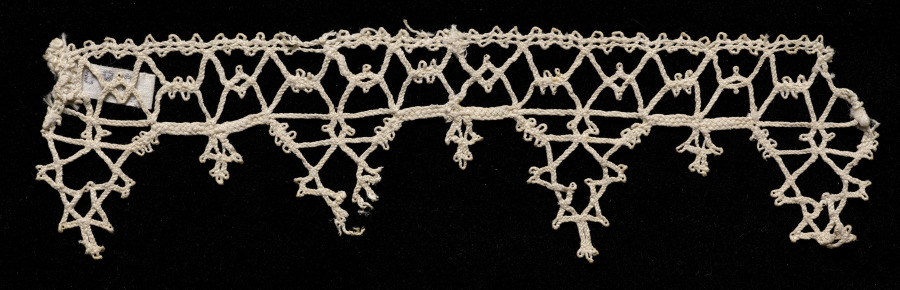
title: Lace Edging of Points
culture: Italy, Venice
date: 1540–60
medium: Bobbin lace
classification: Lace